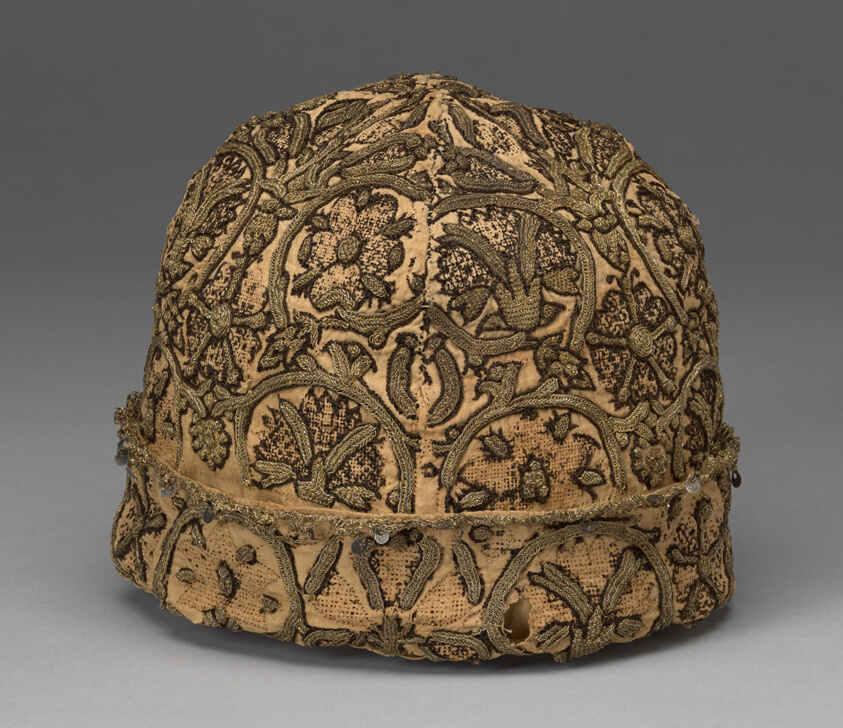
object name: Costume and Accessories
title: Man's Cap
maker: England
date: 16th century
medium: Linen, plain weave; embroidered with silk and gold thread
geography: England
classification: textile; costume accessory - headdress; needlework (visual works); costume - needlework; costume; dress (garment); clothing